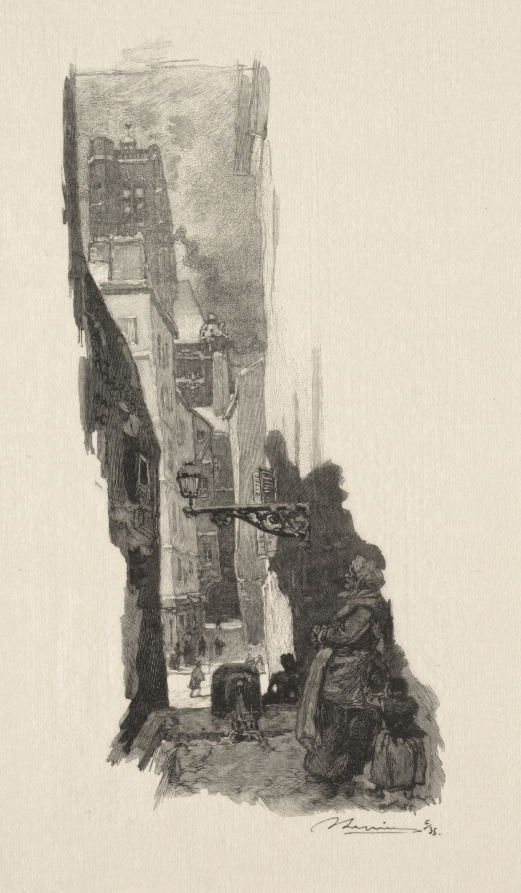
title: Rue Grenier sur l'Eau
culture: France, 19th-20th century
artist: Auguste Louis Lepère (French, 1849–1918)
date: c. 1870–1918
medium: wood engraving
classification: Print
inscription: On block, center left side: "A Lepère del sc."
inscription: Signed in ink, 6/35